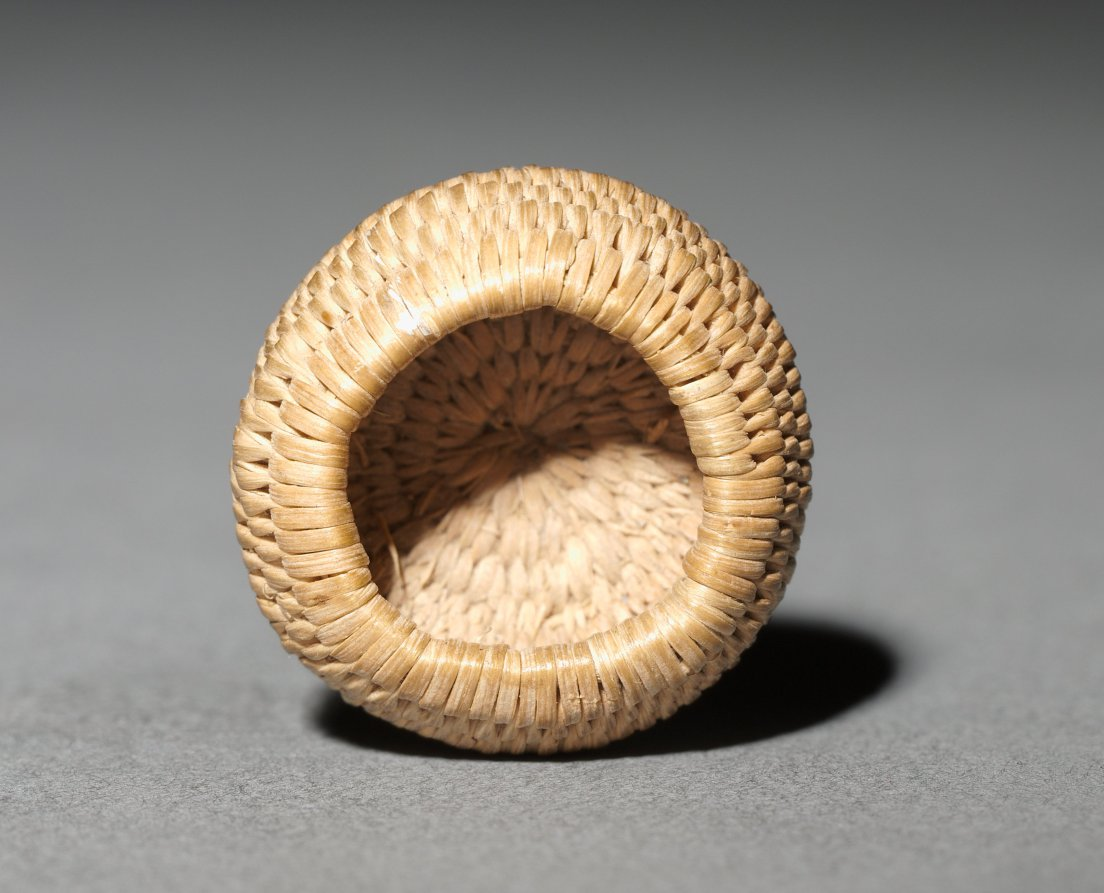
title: Miniature Basket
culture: America, Native North American, Southwest, Arizona, Akimel O'odham (Pima), Unassigned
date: before 1923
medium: plant fiber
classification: Basketry